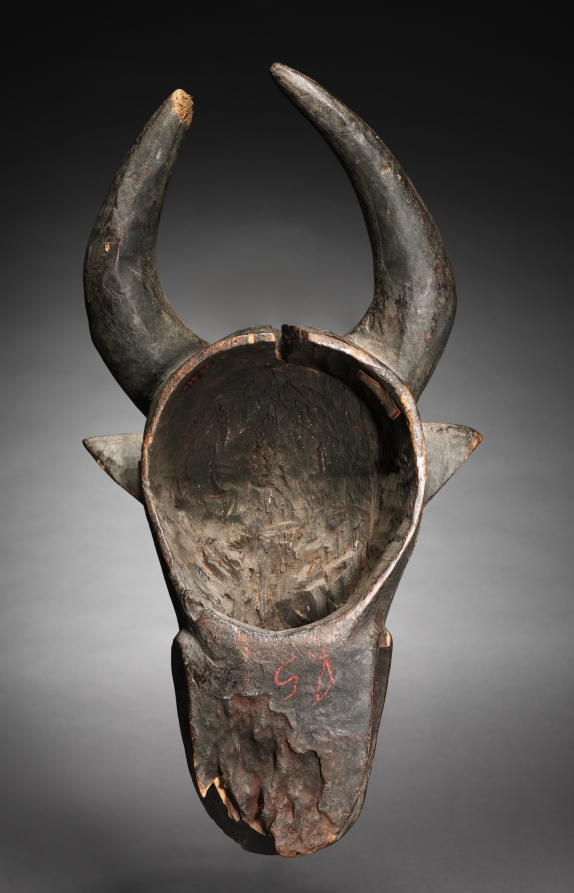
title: Headdress Mask: Buffalo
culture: Africa, Central Africa, Cameroon, Grassfields region, Bamileke-style maker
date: c. 1910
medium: Wood and colorant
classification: Mask